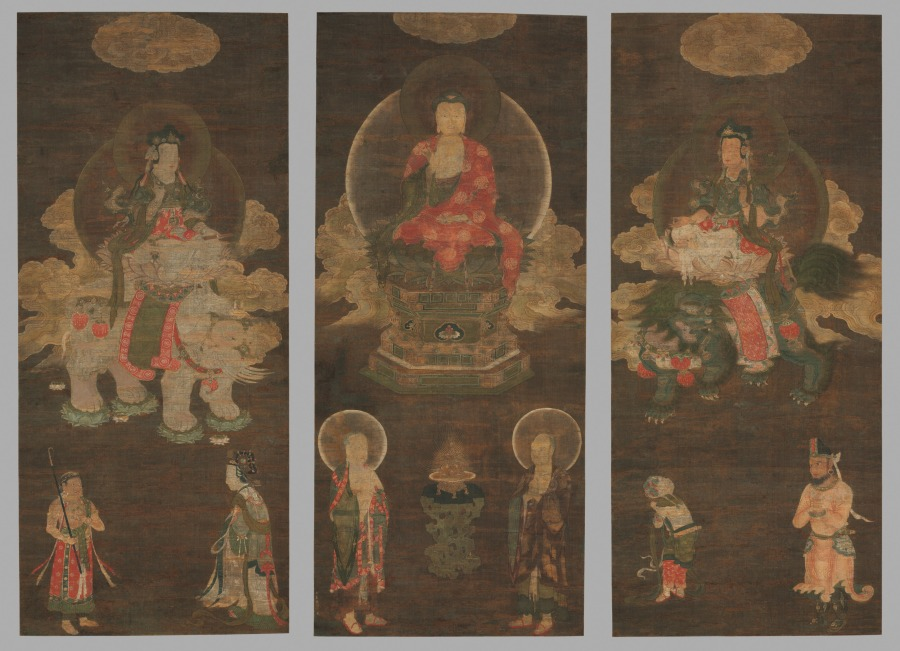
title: Shakyamuni Triad: Buddha Attended by Manjushri and Samantabhadra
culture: China, Fuzhou, Fujian Province, Yuan dynasty (1271-1368)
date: late 1300s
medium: Set of three hanging scrolls; ink and color on silk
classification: Painting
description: This triptych is a rare example of Yuan Buddhist painting. It depicts the historic Buddha Shakyamuni flanked by two attending bodhisattvas, Manjushri (the bodhisattva of wisdom, riding a lion) and Samantabhadra (the bodhisattva of universal virtue, riding an elephant). Below them are others seeking enlightenment: two disciples of the Buddha (Ananada and Kasyapa), two non-Chinese people, a boy with topknots, and a female worshiper. The clouds above and around the divine beings form one scene that illustrates Shakyamuni’s sermon from the Lotus Sutra. This text became an important basis for Buddhist faith throughout East Asia and was central to the Mahayana school of Buddhism.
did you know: This triptych is based on the Lotus Sutra, a Buddhist scripture that welcomes female worshippers.